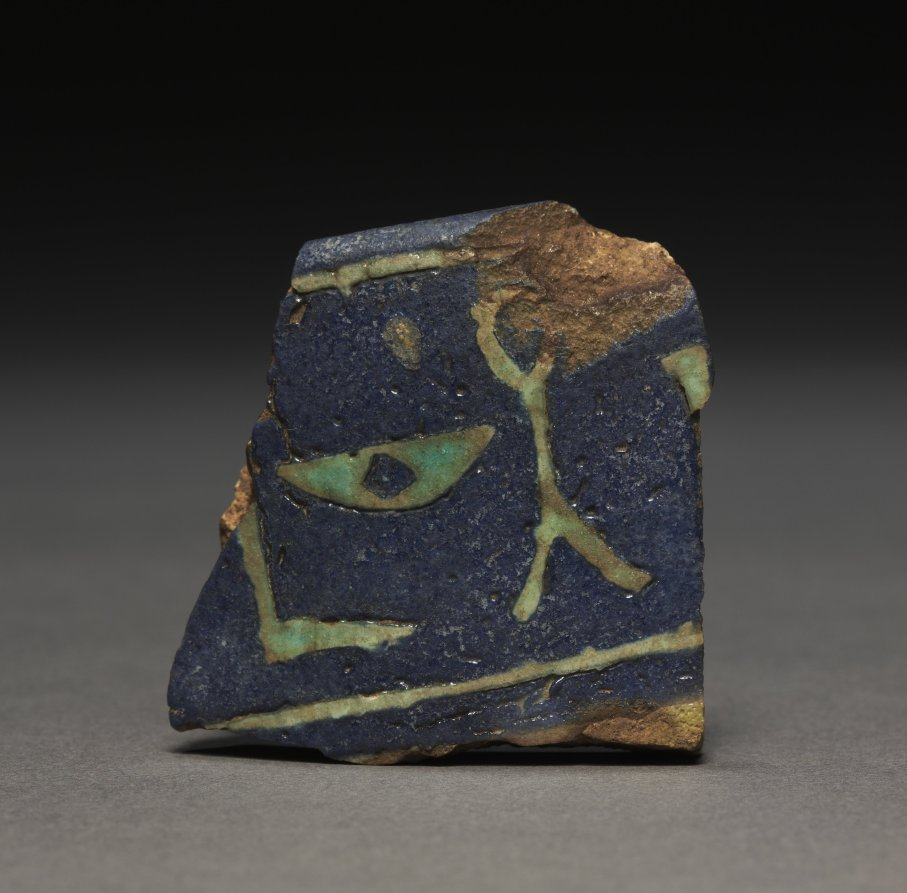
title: Fragment of a Bowl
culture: Egypt, Middle Kingdom (2040–1648 BCE) or later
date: 2030–1650 BCE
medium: faience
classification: Ceramic